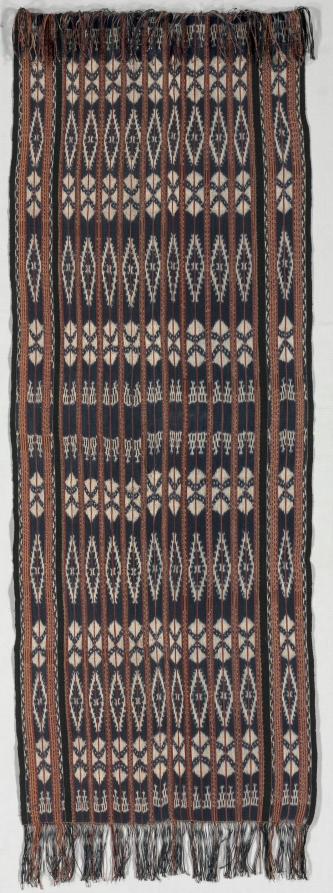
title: Selimut (Man's Textile)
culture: Indonesia, Savu, 20th century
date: 1900s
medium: cotton, ikat dyed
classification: Textile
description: The design of this selimut designates its owner as a member of the Lesser Blossom, one of two Savunese matriarchal groups that controlled life-crisis rituals. Membership in the Lesser or Greater Blossoms was never discussed verbally but only indicated through textile design. Textiles like this, with a very pure form of Lesser (or Greater) Blossom design, were reserved for ceremonial use.